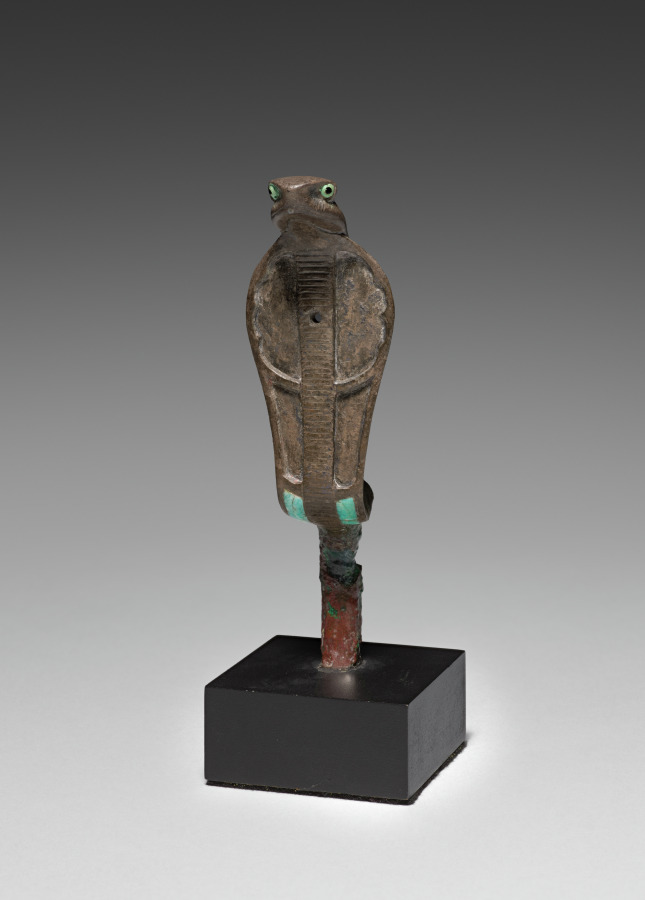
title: Uraeus (Rearing Cobra)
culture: Egypt, New Kingdom (1540–1069 BCE), Dynasty 19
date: 1307–1196 BCE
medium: Silver-copper alloy with inlays (copper, feldspar, turquoise, obsidian?) and gilding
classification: Metalwork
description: Made from a silver-copper alloy, this rearing cobra likely served as a uraeus, symbolizing royal or divine power in ancient Egypt. Its lowermost portion likely fit into the top of the head of a large sculpture, while its body and tail seem cut short, perhaps making room for a solar disk to rise up behind. The eyes are inlaid, and six cavities for additional inlay remain on the expanded hood, the lowermost still intact, the others likely once filled with brightly colored blue and red stone. Much of the remaining surface may once have been gilded, to judge from remaining traces of gold on the back.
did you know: The word uraeus comes from an Egyptian term for “rising/rearing up,” describing the cobra’s position.